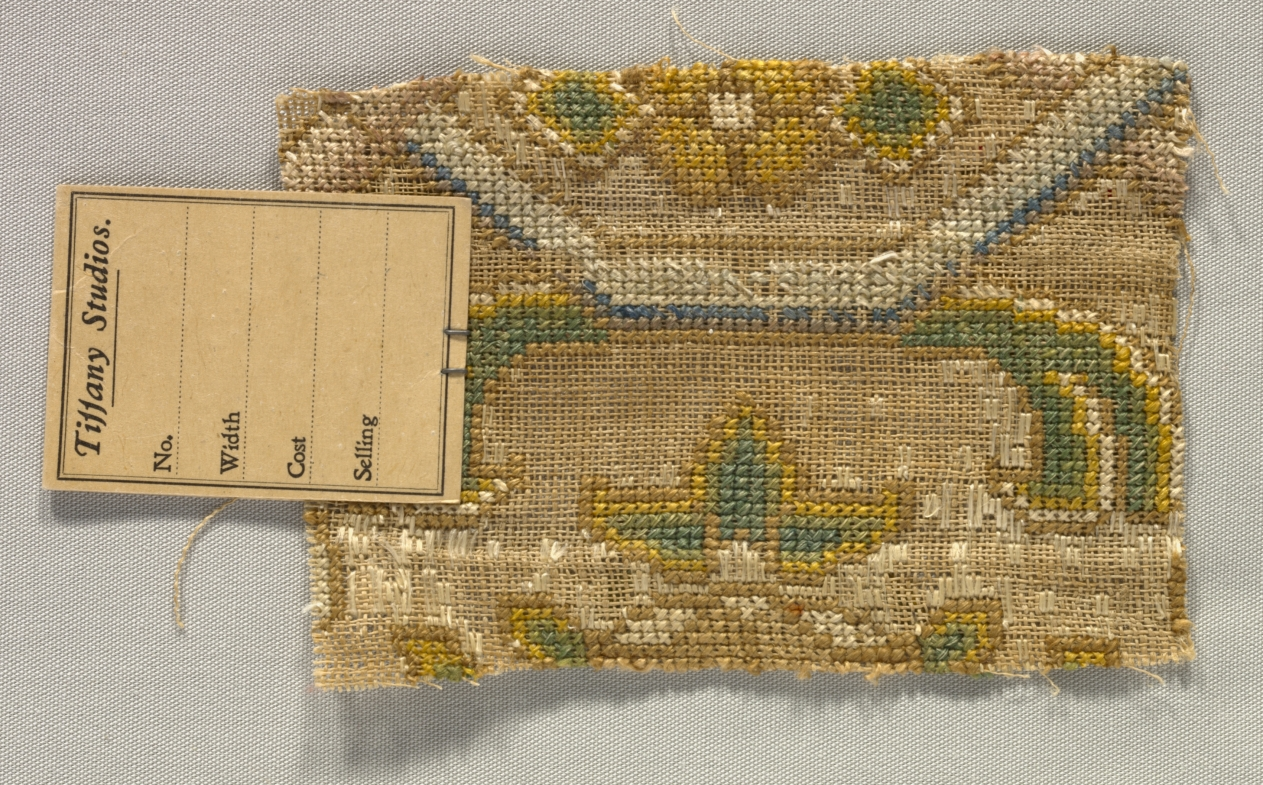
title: Fragment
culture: Italy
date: before 1928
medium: embroidered linen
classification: Embroidery